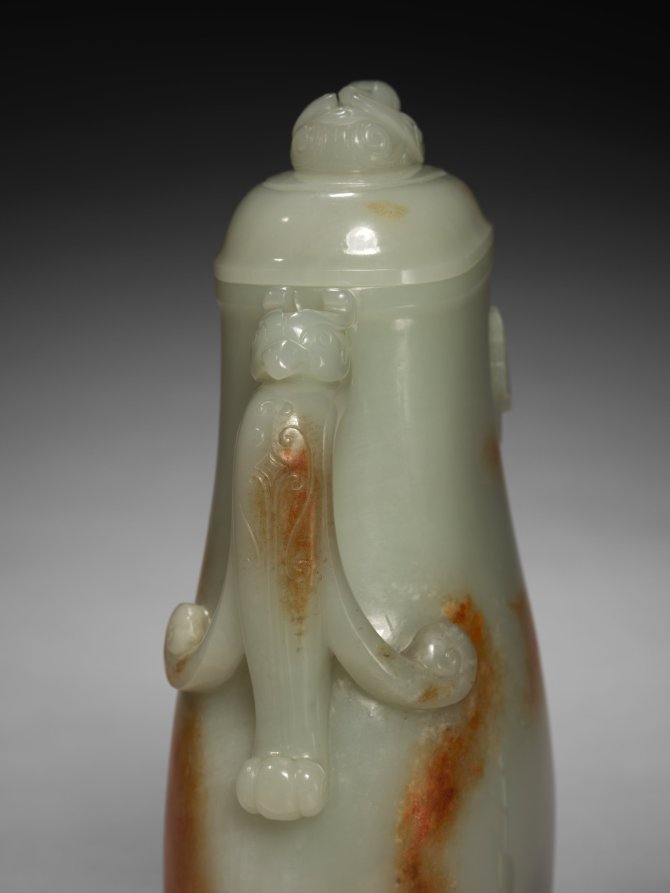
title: Pitcher (Gong) with Dragon and Bird-Headed Handle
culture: China, Qing dynasty (1644–1911)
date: 1700s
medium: pale greenish-white jade with brown markings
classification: Jade